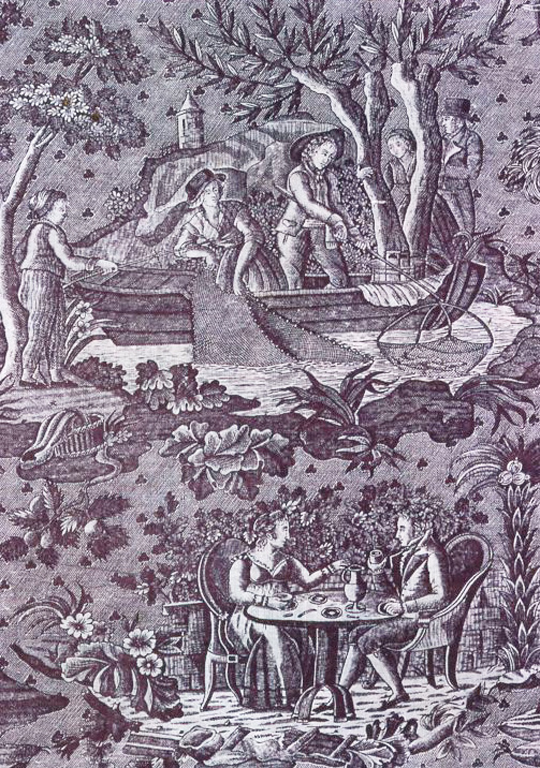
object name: Textile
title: Plaisir de l'été (Pleasure of Summer) (Furnishing Fabric)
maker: Philippe Wyngaert (Flemish, active c. 1820); France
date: c. 1820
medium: Cotton, plain weave; copperplate printed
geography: France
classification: textile; weaving - printed; furnishing textile